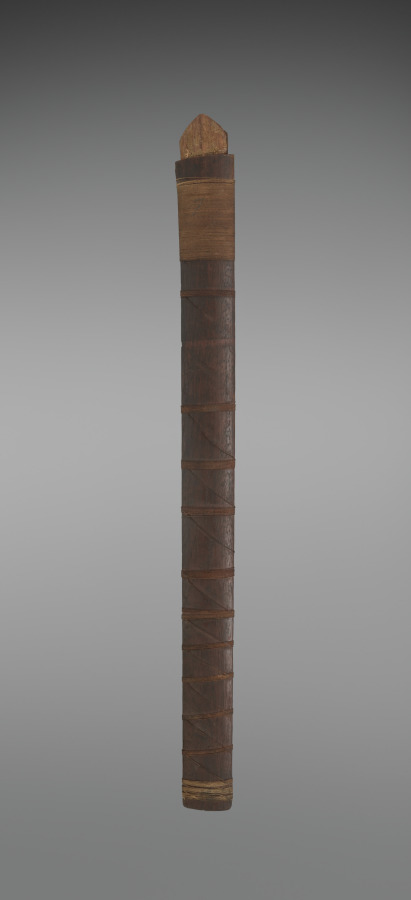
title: Scabbard for Sword (Kalis or Sundang)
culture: Philippines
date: before 1916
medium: Wood and fiber cord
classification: Arms and Armor